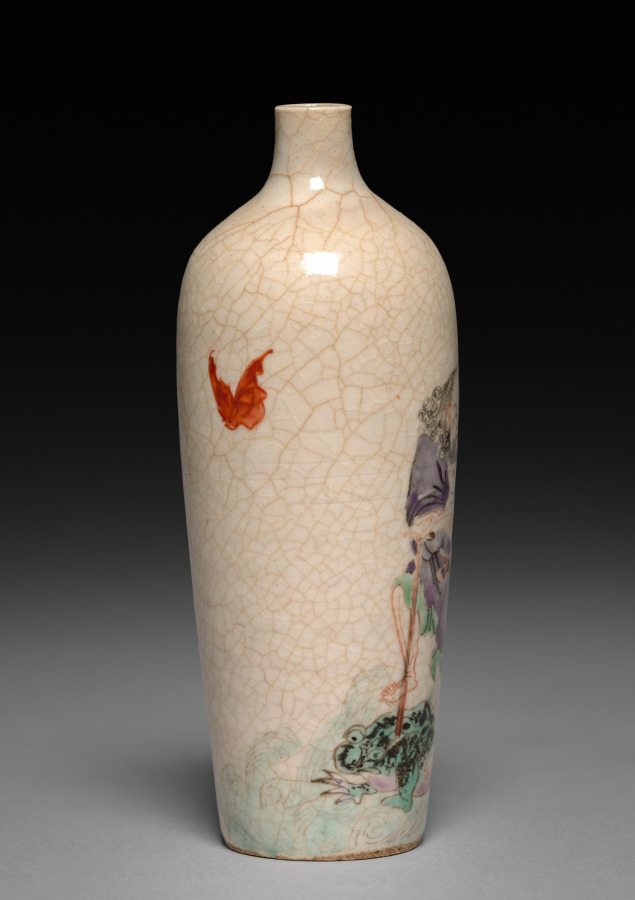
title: Snuff Bottle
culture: China, Qing dynasty (1644–1911), Qianlong reign (1736–95)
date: 1736–95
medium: porcelain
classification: Ceramic